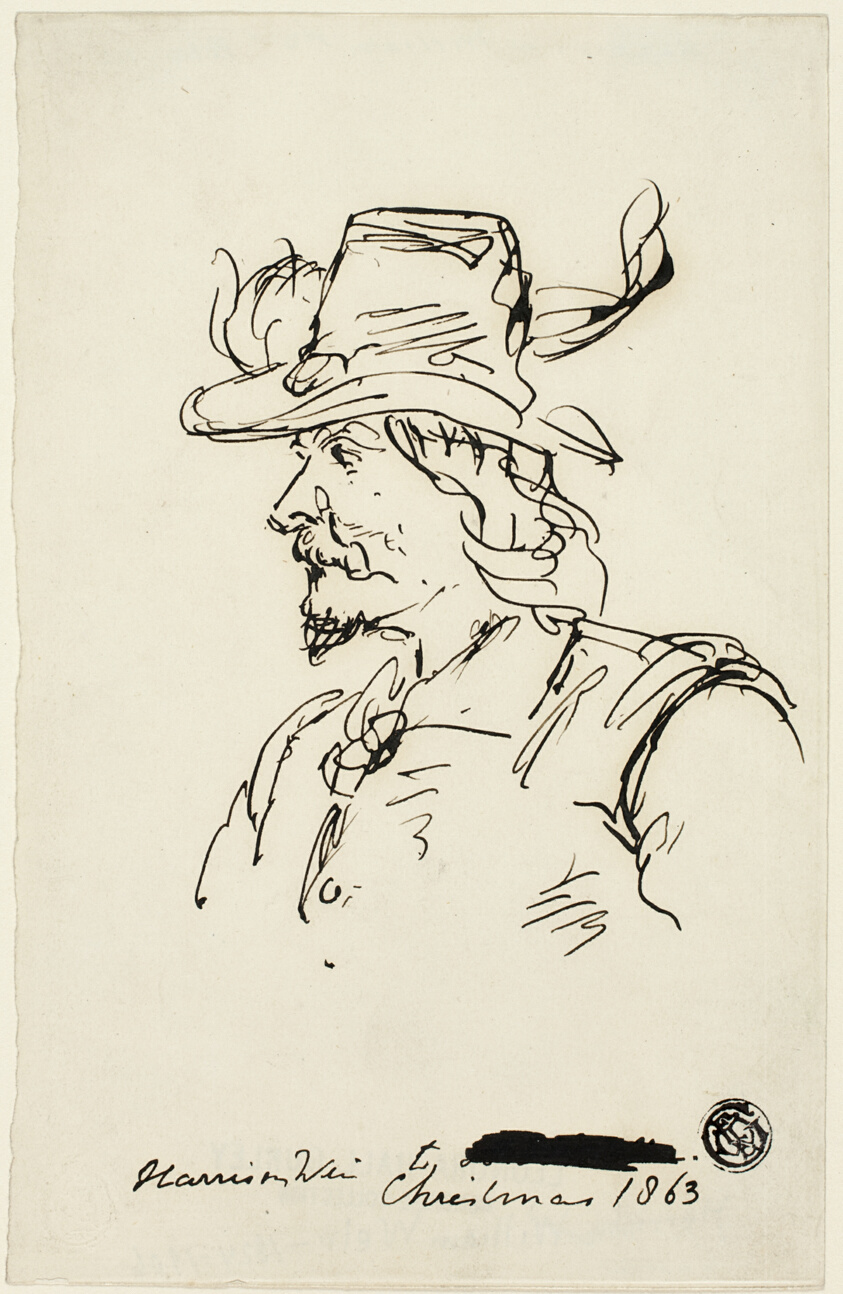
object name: Drawing and Watercolor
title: Head of a Cavalier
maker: Harrison William Weir (English, 1824-1906)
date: 1863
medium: Pen and black ink on ivory laid paper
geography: England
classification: pen and ink drawings; drawings (visual works); prints and drawing